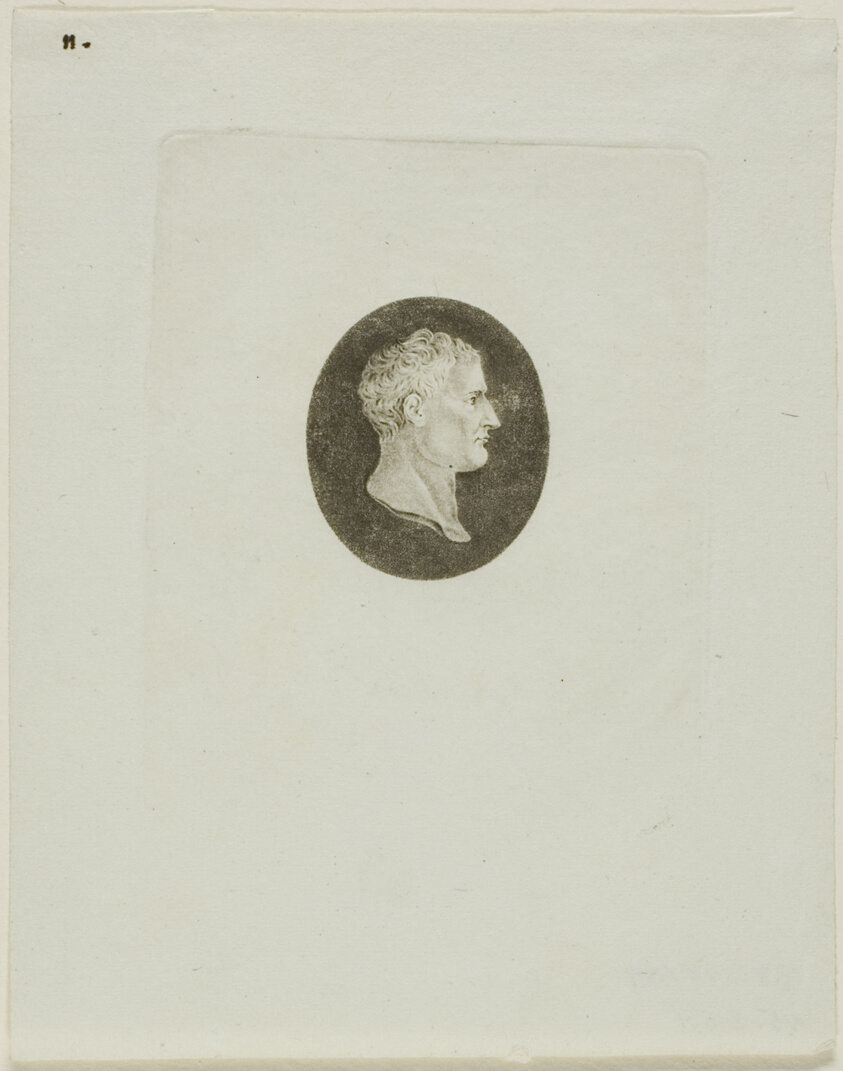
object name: Print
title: Napoleon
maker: Jean-Baptiste de Grateloup (French, 1735-1817); Jean Pierre Sylvestre (French)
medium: Engraving on paper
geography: France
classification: aquatint; print; prints and drawing